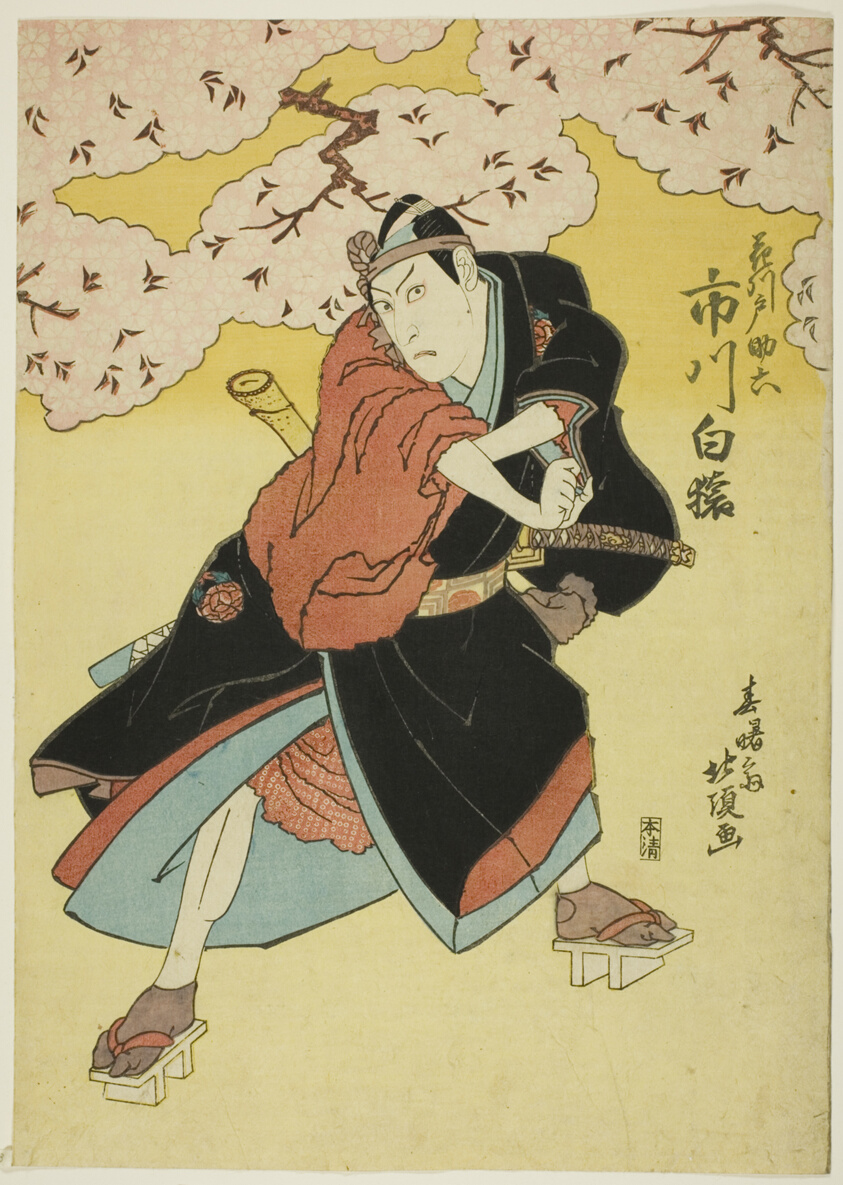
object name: Print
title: The Actor Ichikawa Hakuen as Sukeroku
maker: Shunshosai Hokucho (Japanese, active 1822–30)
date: early 19th century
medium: Color woodblock print; oban, part of multisheet composition (another sheet: 1939.1091)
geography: Japan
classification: print; asian art